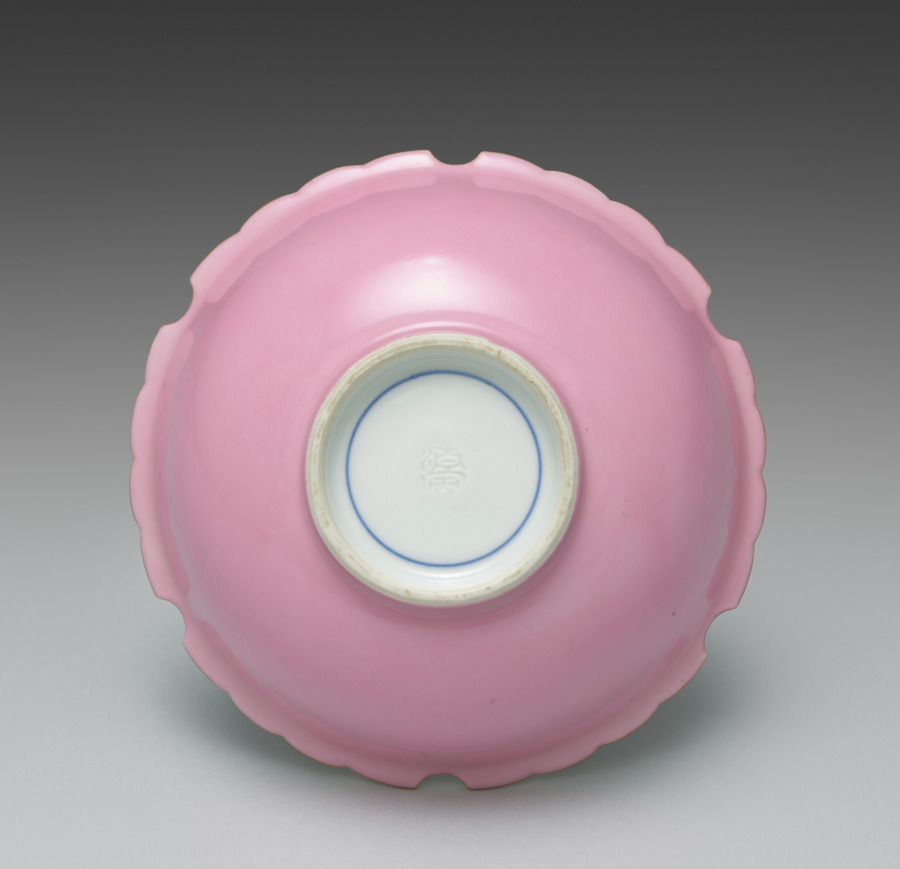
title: Dish from Snow-Flake Side Dishes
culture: Japan, Meiji period (1868–1912)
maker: Seifū Yohei III (Japanese, 1851–1914)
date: 1893–1914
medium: One from a set of six porcelain dishes; porcelain with lobed rims and pink glaze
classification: Ceramic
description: According to the box lid, this set of six side dishes, or mukōzuke, are “snow-flower style” (sekkashiki), having mouths shaped like snowflakes. Their mouths, which have six lobes and scalloped edges, are traced with brown iron oxide at the rim. The outside of each bowl is glazed with a very bright pink over the basin and foot, and the inside is left white. From directly above, one sees a snowflake-like shape, and from the side, they seem to float above a rosy ground.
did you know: The box for this set of dishes has an inscription on the side noting that they were for a person with the family name Nakamoto.